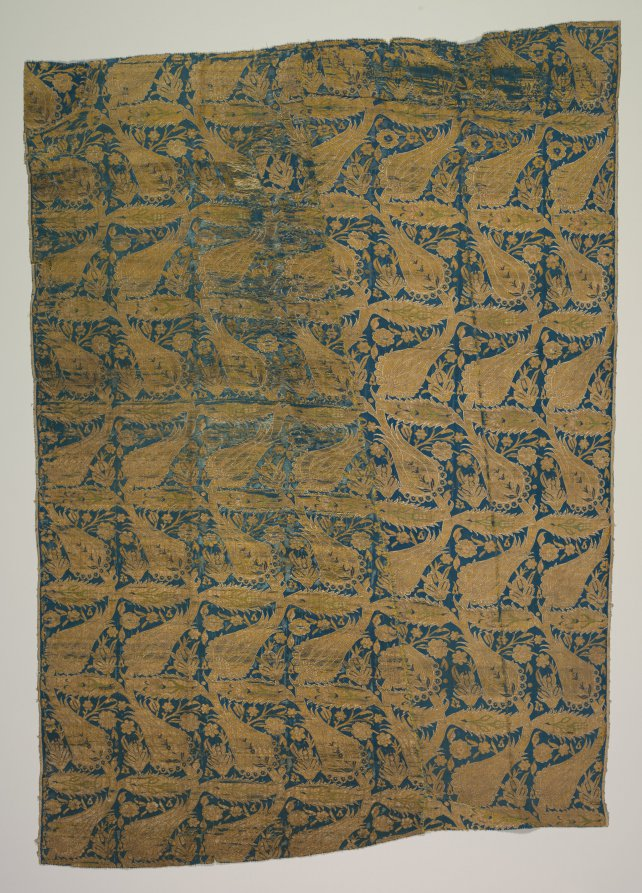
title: Lampas with compressed undulating vines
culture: Turkey, Bursa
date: early 1600s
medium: lampas: silk and gilt-metal thread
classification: Textile